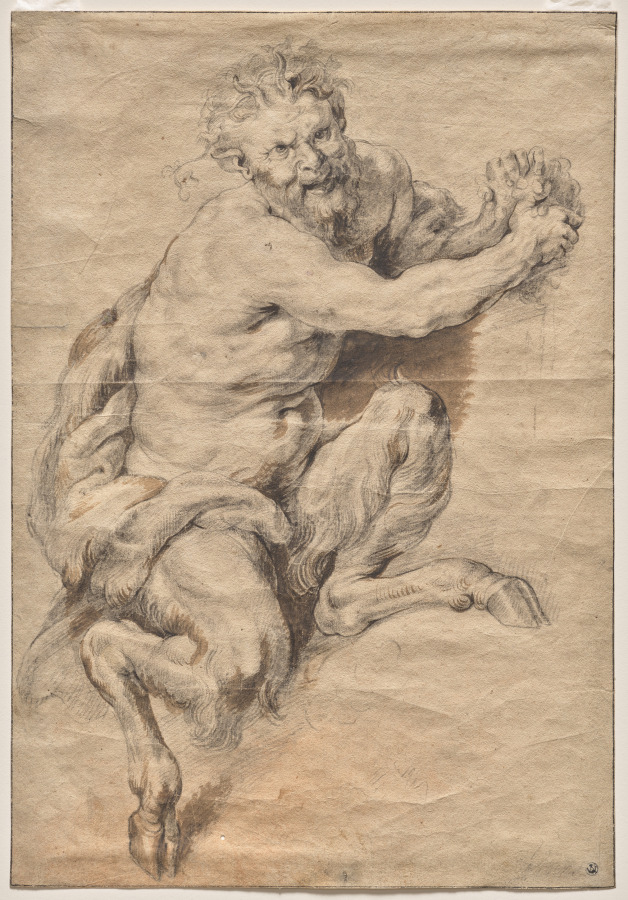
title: A Faun Grasping a Bunch of Grapes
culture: Flanders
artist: studio of Peter Paul Rubens (Flemish, 1577–1640)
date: after 1616–18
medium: black chalk and brush and brown wash; framing lines in pen and black ink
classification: Drawing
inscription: VERSO, upper right, in brown ink: no 40 ; lower left, in brown ink: 6/14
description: This drawing relates to a finished painting (now lost) by Peter Paul Rubens that depicted a faun (a woodland creature similar to a satyr) squeezing grapes into the mouth of a young Bacchus. That figure, shown here, could be Silenus, who educated Bacchus on the pleasures of wine, revelry, and nature. Rubens ran a large studio and employed numerous apprentices, one of whom may have made this copy after the original painting. As a form of instruction, Rubens added ink wash to the drawing to enhance the shading on the figure and shadows behind it.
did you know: Swirling draperies like the one haphazardly worn by this faun do more than conceal, in many cases they reveal an artist's technical skill. To render folds and gathers in fabric, artists used chiaroscuro, meaning contrasting light and dark tones.